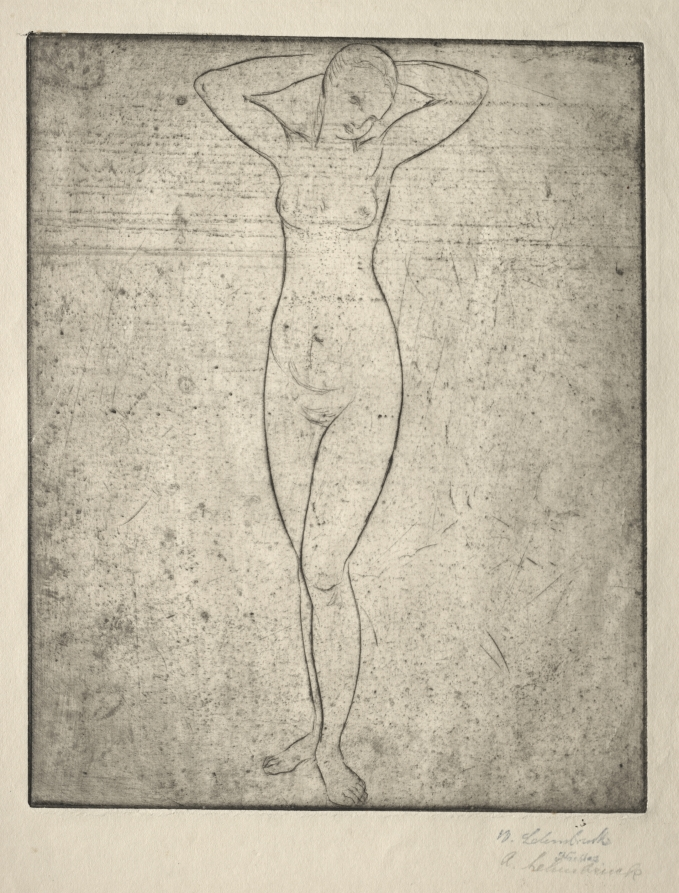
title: Standing Girl with Arms Behind her Head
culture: Germany, 20th century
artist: Wilhelm Lehmbruck (German, 1881–1919)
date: 1912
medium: etching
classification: Print